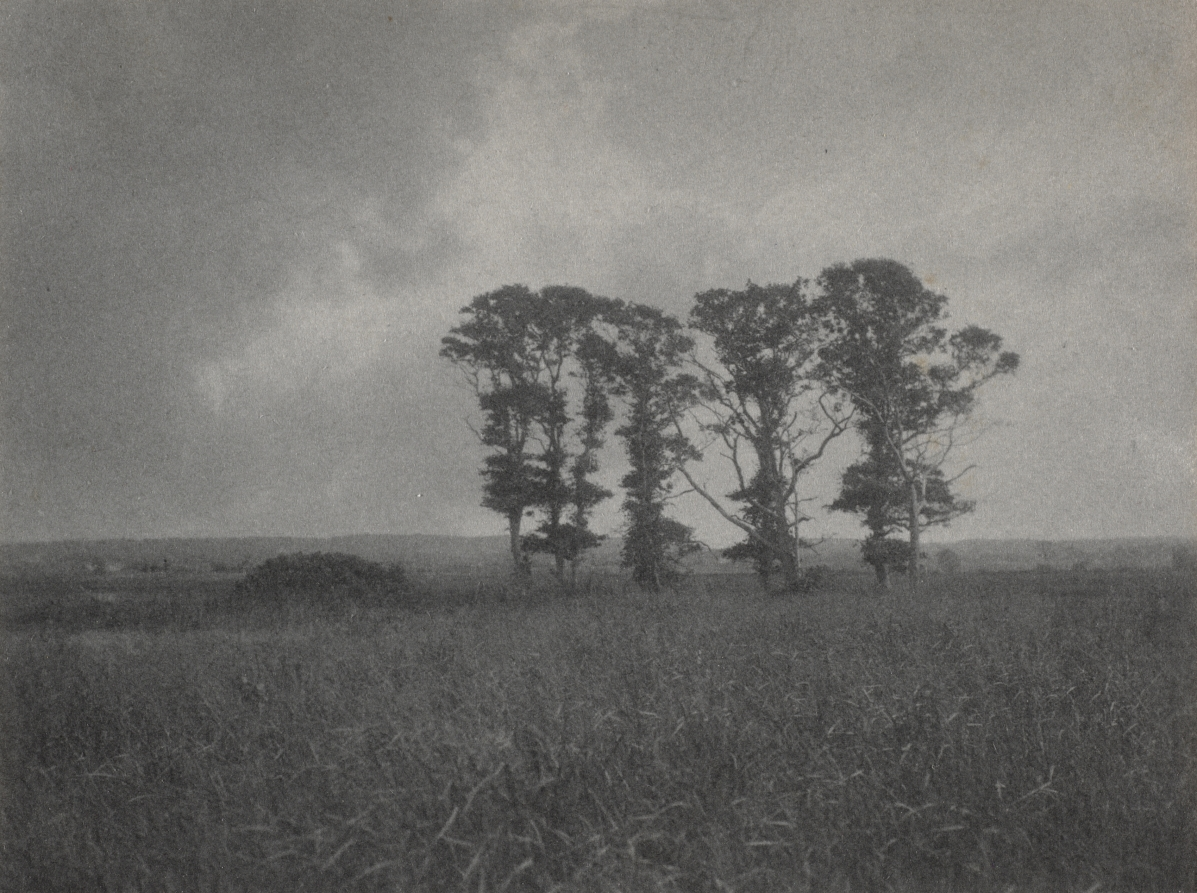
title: Untitled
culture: America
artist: William J. Mullins (American, 1860–1917)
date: c. 1900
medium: platinum print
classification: Photograph